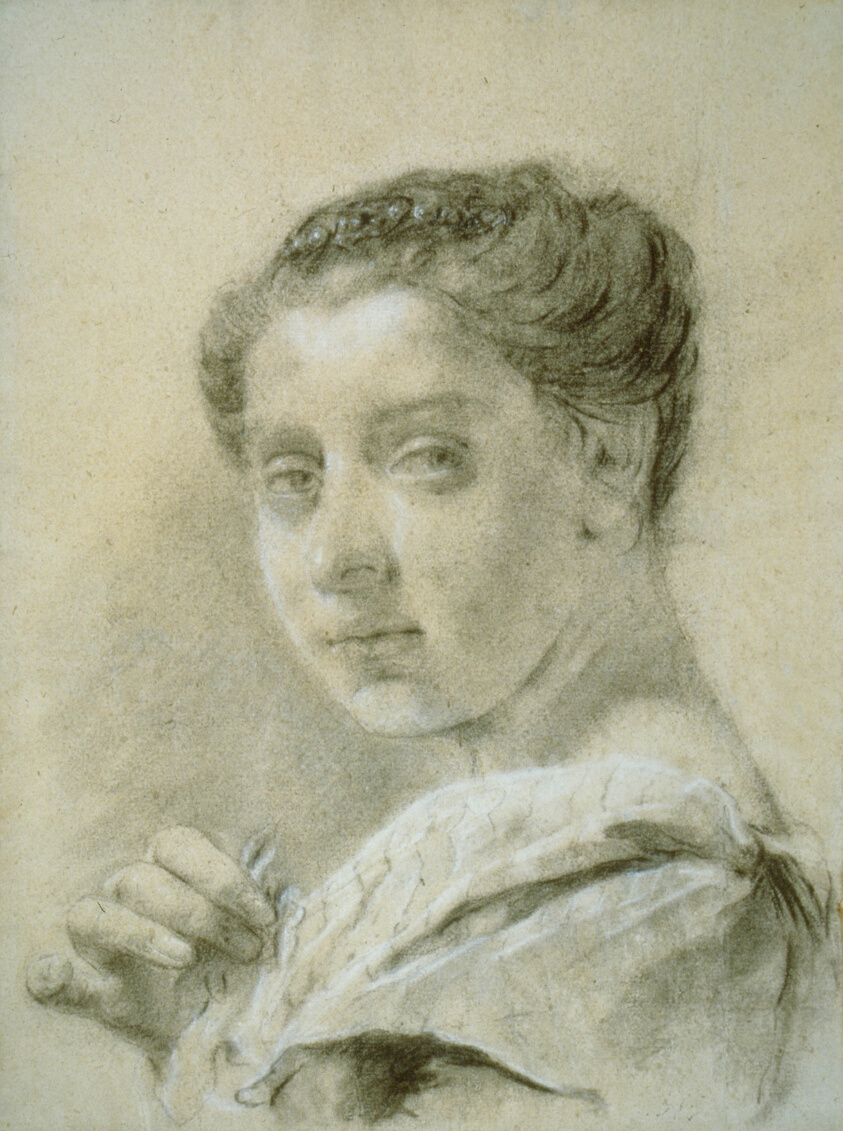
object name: Drawing and Watercolor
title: Portrait of a Young Woman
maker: Giovanni Battista Piazzetta (Italian, 1682-1754)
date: c. 1730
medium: Black chalk, with stumping, heightened with touches of white chalk, on blue-gray laid paper, discolored to cream, laid down on tan wood-pulp board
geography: Italy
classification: chalk; drawings (visual works); prints and drawing